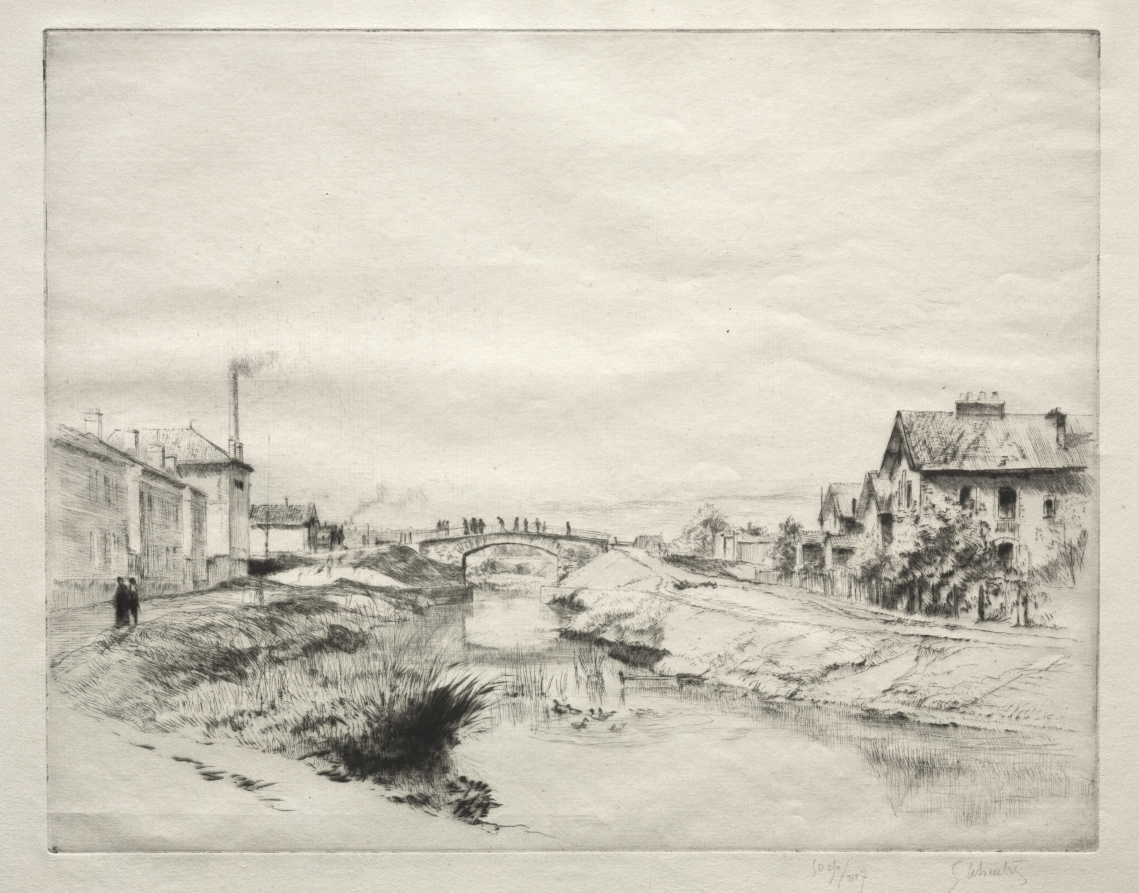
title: Workmen's House at Troyes, France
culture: France, 19th-20th century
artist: Gustave Leheutre (French, 1861–1932)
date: c. 1900–1921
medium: etching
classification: Print